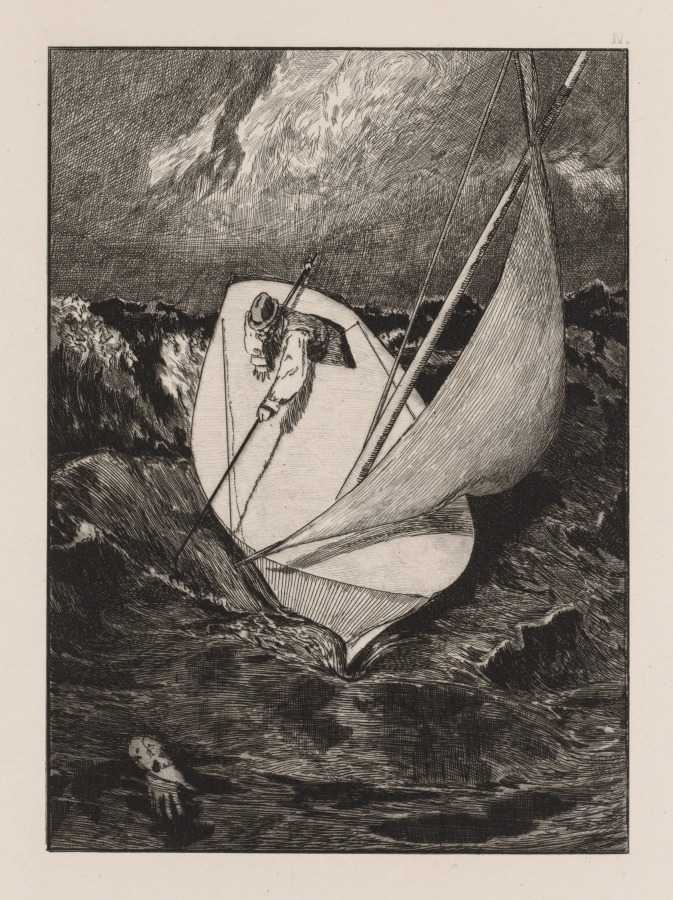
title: A Glove: The Rescue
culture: Germany, 19th century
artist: Max Klinger (German, 1857–1920)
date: 1880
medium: etching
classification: Print